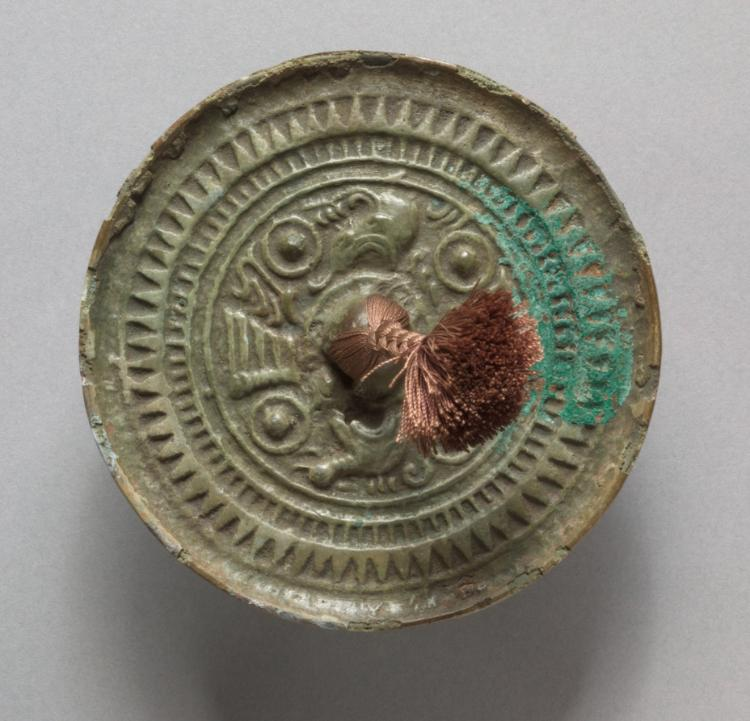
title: Mirror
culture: Korea, Goryeo dynasty (918–1392)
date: 918–1392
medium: bronze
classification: Metalwork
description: From ancient times, a mirror assumed various roles: a ritualistic tool, a diplomatic gift, and a luxury commodity. During the Goryeo dynasty (918–1392), which saw the great advancement of metallurgy, the royal court was the center of distributing sophisticated bronze artifacts. According to historical records, on the seventhth day of the Lunar New Year, the king bestowed a bronze mirror inscribed with auspicious symbols upon each court official as part of a ceremony to celebrate the Day of Humans. This explains why a large quantity of bronze mirrors were buried in elite tombs.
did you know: Due to its origin as an important tool in religion and politics, mirrors are often mentioned in many Korean proverbs that warn about certain behaviors.